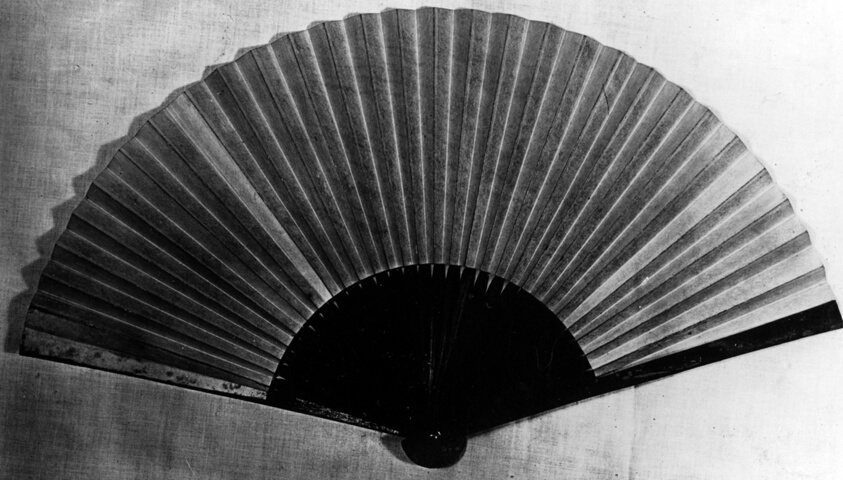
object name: Costume and Accessories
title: Fan (Military or Battle)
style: edo (japanese period)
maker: Japan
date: 18th century, Edo period (1615–1868)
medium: Paper mount; bamboo sticks; iron guards inlaid with silver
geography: Japan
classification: textile; fan - paper; costume accessory - folding fan; costume